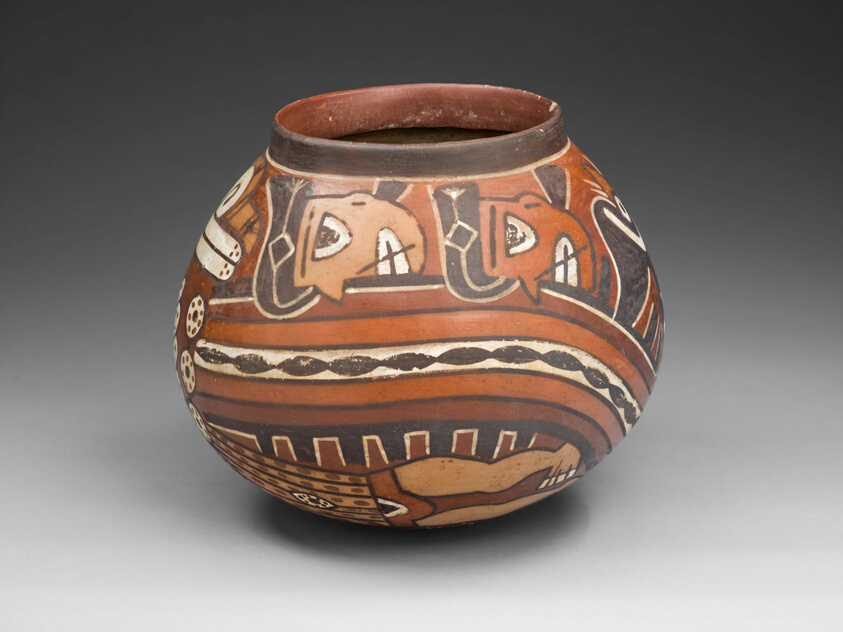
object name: Vessel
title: Vessel Depicting a Costumed Ritual Performer Holding a Staff and a Trophy Head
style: nazca, early intermediate period, Pre-Columbian, americas, Arts of the Americas, andean, andes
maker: Nazca; South coast, Peru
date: 180 BCE–500 CE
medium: Ceramic and pigment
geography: Peruvian South Coast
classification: earthenware; art of the americas; ceramics; vessel